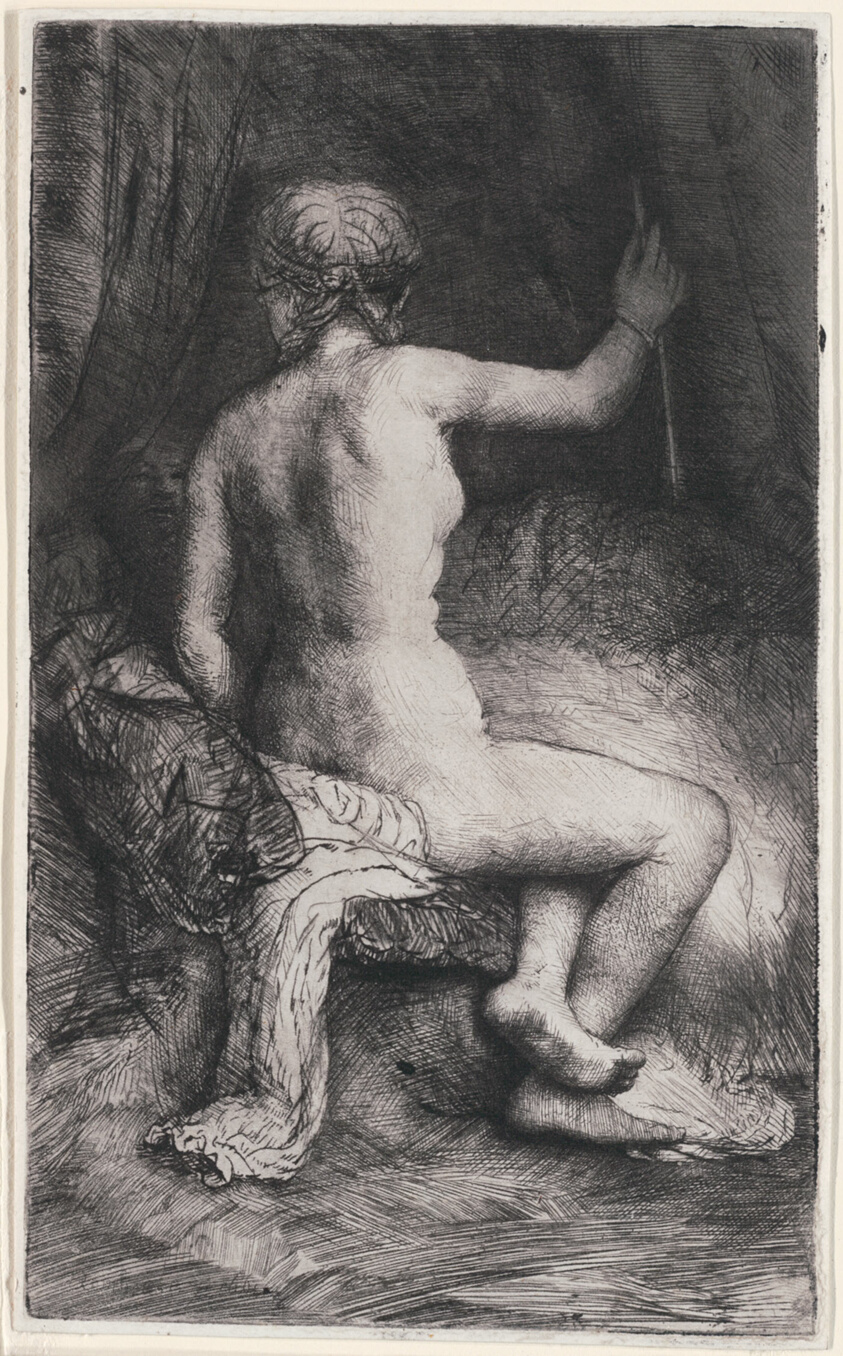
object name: Print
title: Woman with the Arrow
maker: Rembrandt van Rijn (Dutch, 1606-1669)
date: 1661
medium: Etching, drypoint and burin on ivory laid paper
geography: Holland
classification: etching; print; prints and drawing; paper; drypoint; burin